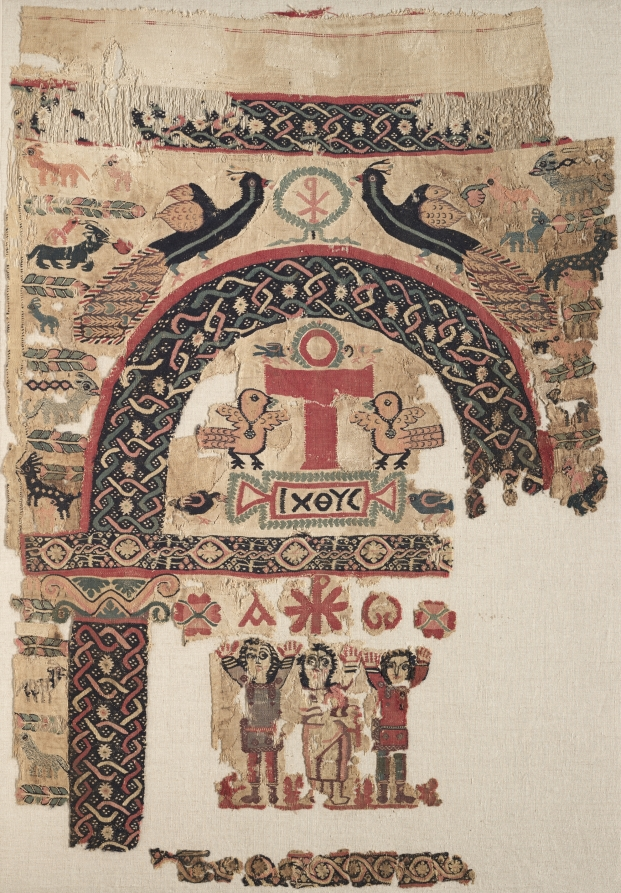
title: Hanging with Christian Images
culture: Egypt, Byzantine period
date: 500s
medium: dyed wool, undyed linen: plain weave (tabby) with inwoven tapestry weave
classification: Textile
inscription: inscribed below the ankh cross: IXOYC.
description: This rare surviving hanging with Christian symbols likely served as a wall decoration in a church or a home. The three men who stand beneath an arch may represent the three Hebrews who refused to worship a golden idol, and when cast into the fiery furnace, remained unharmed due to God’s deliverance (Daniel 3:19–30). Above them is a Christogram formed by the first two letters of Christ’s name in Greek, X (chi) and P (rho), flanked by the letters for alpha and omega. Beneath the arch, an ankh, an ancient Egyptian symbol of life, is framed by two birds. Another Christogram appears above the arch between two peacocks. The significance of the combined use of these images and symbols lies in their invocation of Christ’s redemptive and life-giving power.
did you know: The two peacocks in the upper half of this composition represent immortality. Ancient Greeks and Romans believed that the body of the peacock did not decay after death and when this imagery was adopted by Christianity, the bird came to be associated with resurrection.